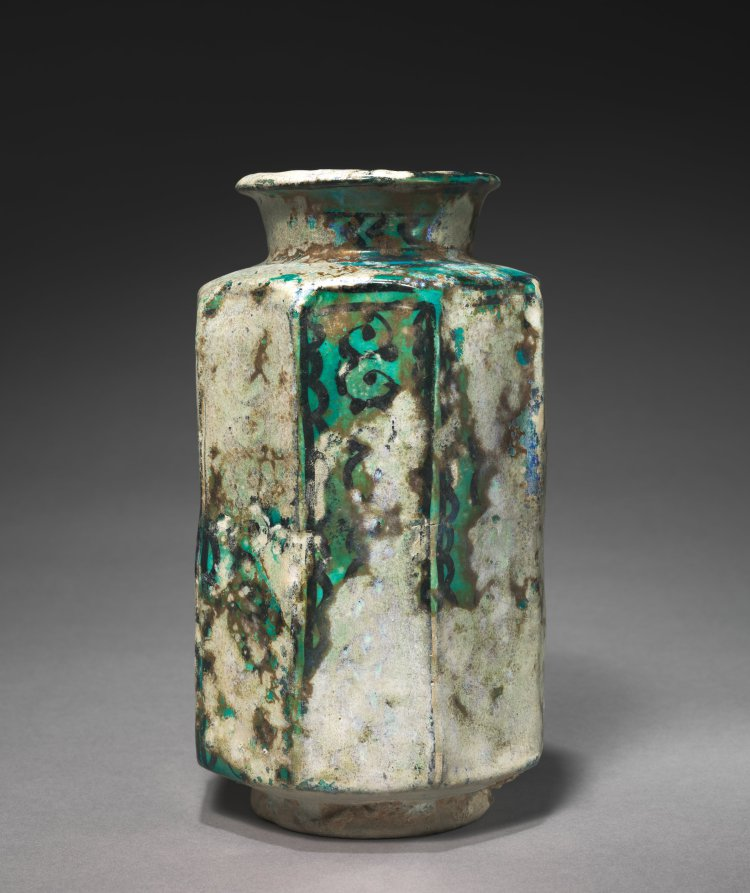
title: Albarello Jar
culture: Syria (Raqqa), Ayyabid Period, 13th Century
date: 1200s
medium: fritware with underglaze-painted design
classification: Ceramic